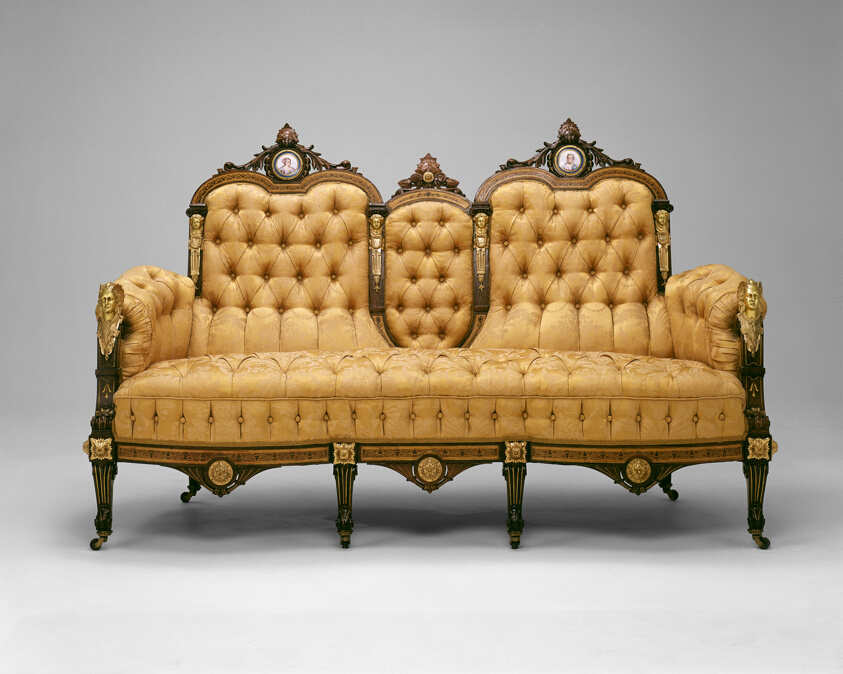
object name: Furniture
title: Sofa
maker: Artist unknown (American, 19th century); New York; Ormolu mounts by Pierre E. Guerin; American, founded 1857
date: 1860–70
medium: Rosewood, inlays of various woods, ormolu mounts, porcelain plaques, and upholstery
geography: New York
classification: seating; ceramics; furniture; american decorative arts; american arts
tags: furniture